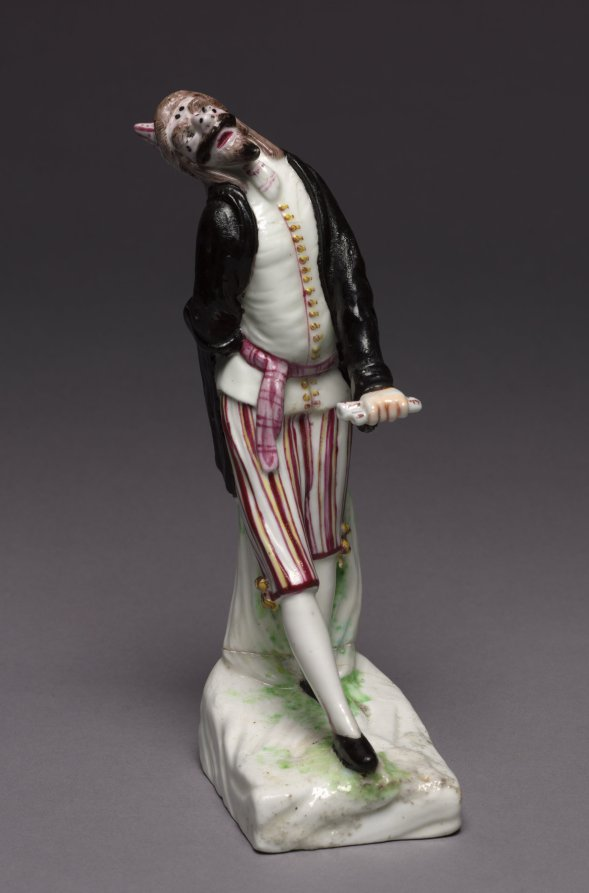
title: Figure of Pantalone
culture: France, Mennecy, 18th century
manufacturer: Mennecy Factory (French)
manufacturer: Mennecy- Villeroy Factory (French)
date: c. 1755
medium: soft-paste porcelain with enamel decoration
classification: Ceramic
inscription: Mennecy-Villeroy factory mark, incised on bottom: "DV"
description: The commedia dell’arte, a form of Italian improvisational theater, became widely popular in 18th-century Europe. This figure, with his prominent beard and distinguishing black robe, represents the character of elderly Venetian merchant Pantalone. Depicted in paintings and porcelain, the popularity of these figures demonstrated the influence of the theater on the tastes of the wealthy.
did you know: In the commedia dell’arte, Pantalone was known for his greed, lust, and buffoonery that made him the target of jokes.